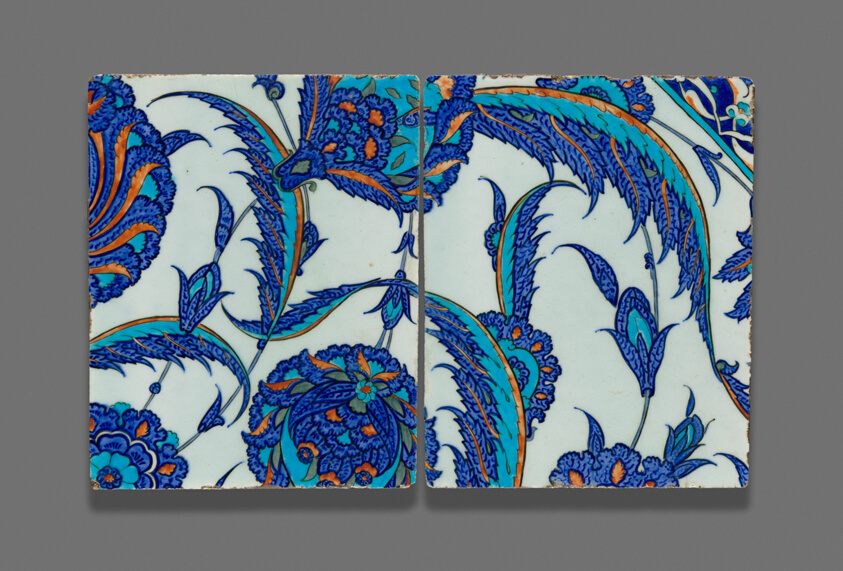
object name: Architectural fragment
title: Pair of Tiles with Floral Design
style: Islamic (culture or style)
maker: Turkey; Iznik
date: Ottoman dynasty (1299–1923), c. 1560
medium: Iznik ware, fritware painted in blue, turquoise, red, green, and black under a transparent glaze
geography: Iznik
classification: earthenware; asian art; ceramics; architectural fragment